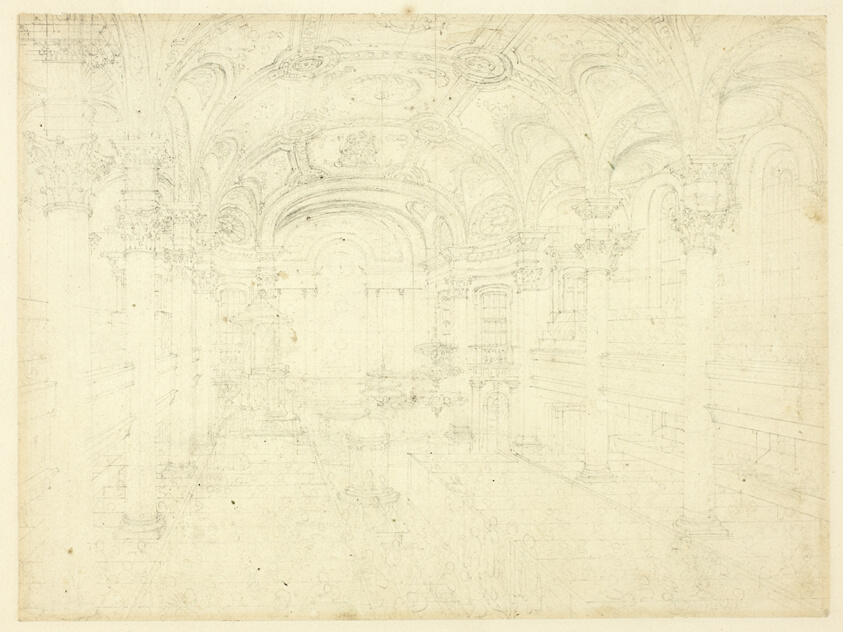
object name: Drawing and Watercolor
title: Study for St. Martin's in the Fields, from Microcosm of London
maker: Augustus Charles Pugin (English, born France, 1762-1832); Thomas Rowlandson (English, 1756-1827)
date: c. 1809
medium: Graphite on cream wove paper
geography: England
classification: graphite; drawings (visual works); prints and drawing